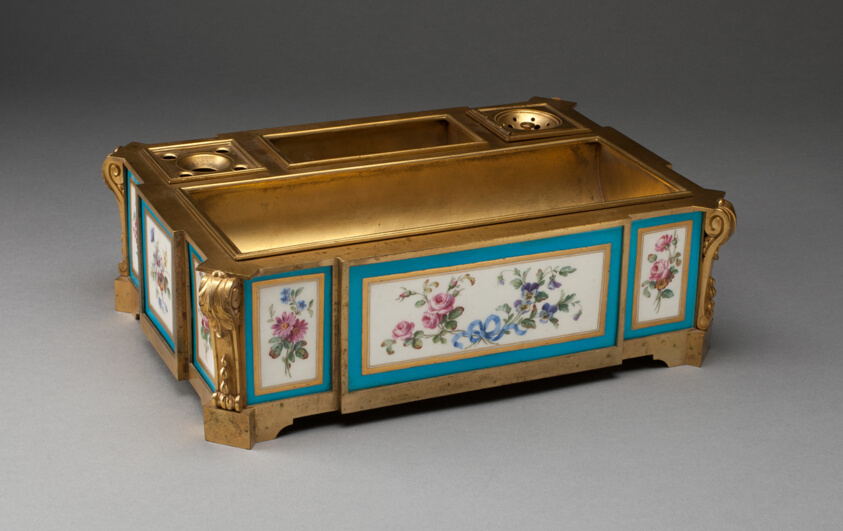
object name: Ceramics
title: Inkstand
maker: Sèvres Porcelain Manufactory; French, founded 1740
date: Late 18th / Early 19th century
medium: Soft-paste porcelain, polychrome enamels, gilding, and gilt bronze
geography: Sèvres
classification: porcelain; ceramics; european decorative arts